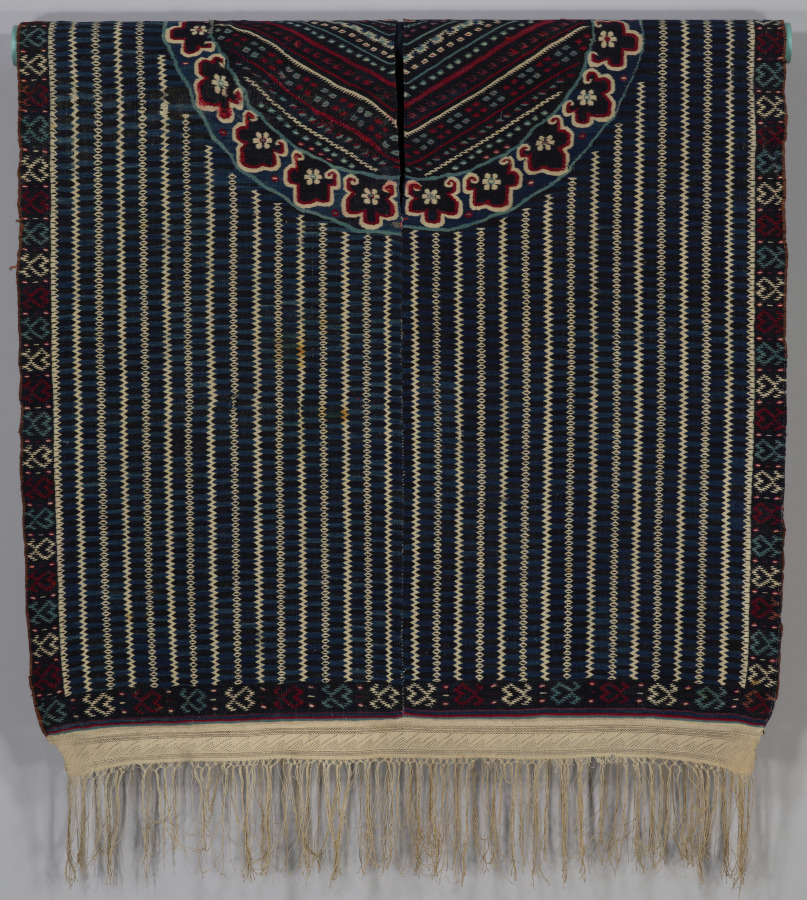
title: Saltillo Sarape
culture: Mexico, Coahuila state, Saltillo Region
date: c. 1840–60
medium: Wool, cotton; tapestry weave, macramé fringe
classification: Textile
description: The sarape (wearing blanket) is a classic Mexican men’s garment that became a symbol of national identity and pride after Mexico achieved independence from Spain in 1821. Examples woven between about 1750 and 1875 in Saltillo, a town in northern Mexico, are the sarape’s most famous representatives, prized for their design, color, and technical refinement.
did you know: Saltillo sarapes (wearing blankets) are prized for their design, color, and technical refinement.